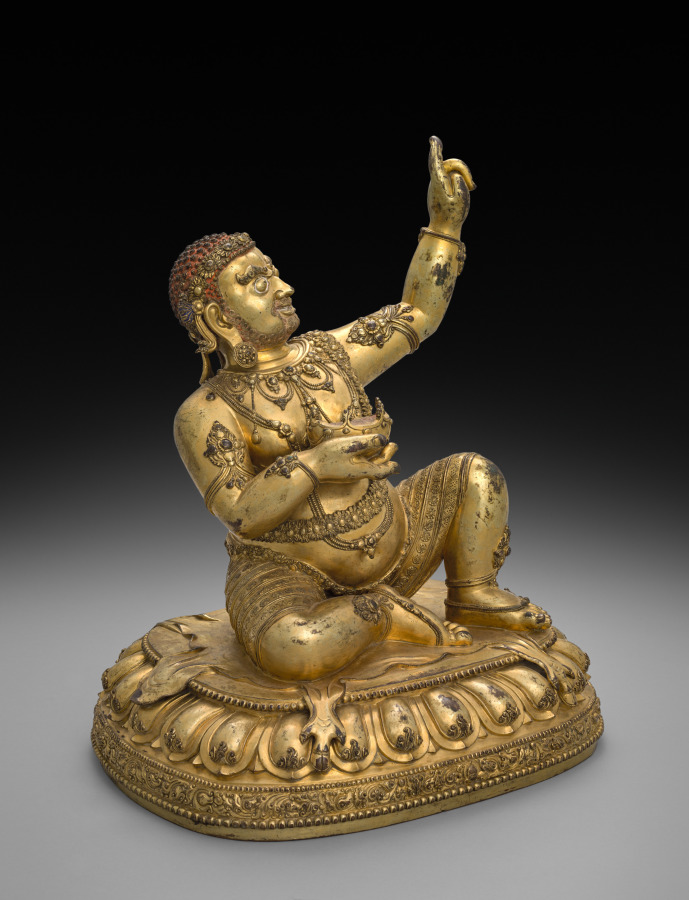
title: Virupa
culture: China, Ming dynasty (1368-1644), Yongle reign (1403-1424)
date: early 1400s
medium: Gilt bronze with silver, stones, and pigment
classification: Sculpture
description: Virupa is one of the great teachers in the history of tantric Buddhism. His posture references his ability to stop the sun; as an enlightened being, he can control phenomena of nature. As a tantric practitioner, he overturns ordinary assumptions about proper behavior, so he overeats, drinks large quantities of liquor, and waits for the king to pay his bill at the tavern. At the edge of the lotus pedestal is an inscription identifying the image as having been made in the imperial kilns of the third emperor of the Ming dynasty in China as a gift to a Tibetan monastic leader. While closely linked to Tibetan styles, the luxurious detailing, special gilding process, and the casting of the ornaments onto the body without use of inlay are specifically Chinese characteristics.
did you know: Virupa's clothing and jewelry are embellished with silver and stones, while pigments enhance his hair and eyes.